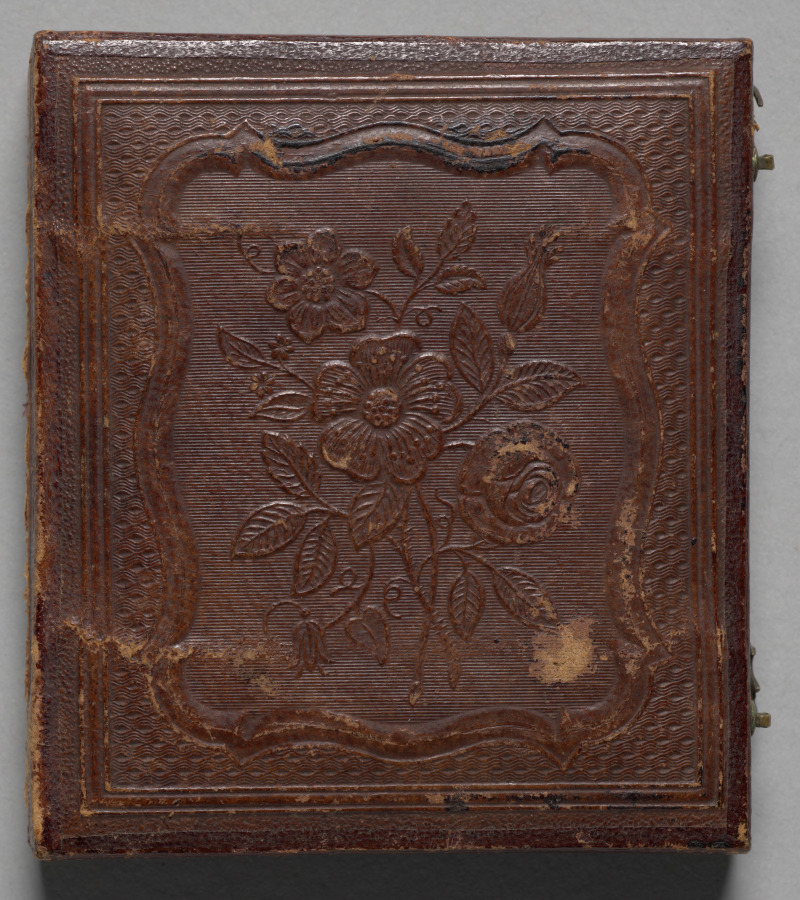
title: Standing boy with bottle curls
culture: America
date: c. 1853–54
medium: daguerreotype, sixth plate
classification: Photograph